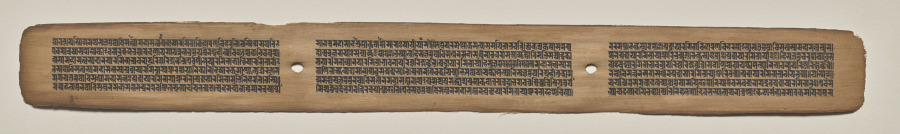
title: Text, folio 167 (recto), from a Manuscript of the Perfection of Wisdom in Eight Thousand Lines (Ashtasahasrika Prajnaparamita-sutra)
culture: Eastern India, Bihar, Vikramashila Monastery. Painting: Nepal, Kathmandu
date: Sunday, September 14, 1119 (year 239 of the Newar Samvat in the month of Ashvina)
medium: gum tempera and ink on palm leaves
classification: Painting